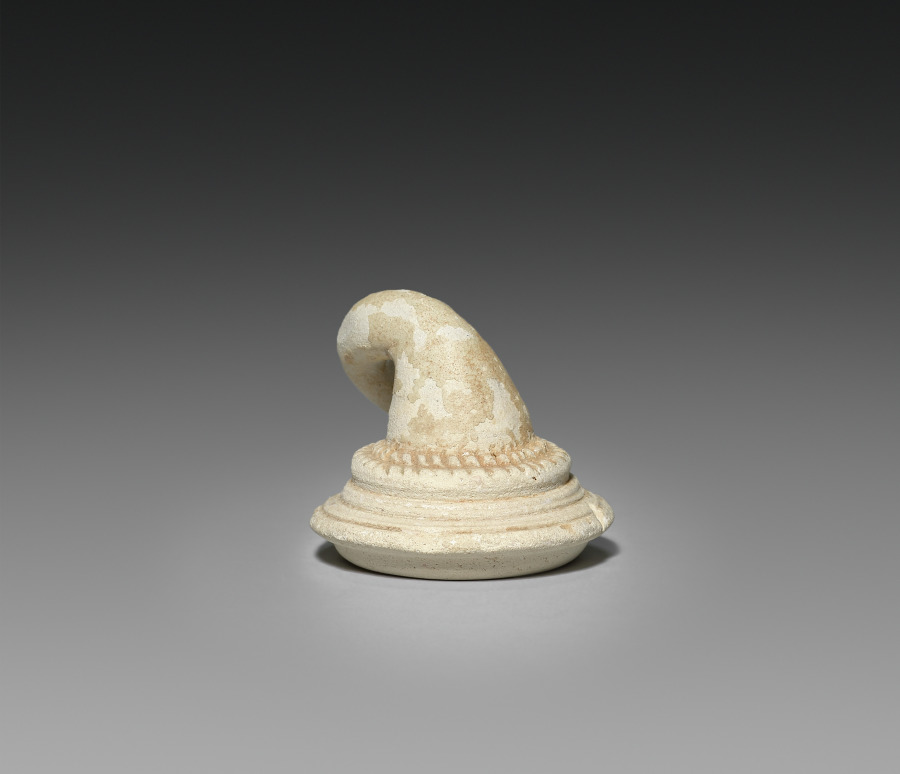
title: Jar in the Shape of a Fruit (Lid)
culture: Cambodia, Northeast Thai kiln, Khmer Ware, Angkor Wat/Bayon period, 12th century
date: 1100s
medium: glazed pottery with brown slip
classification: Ceramic